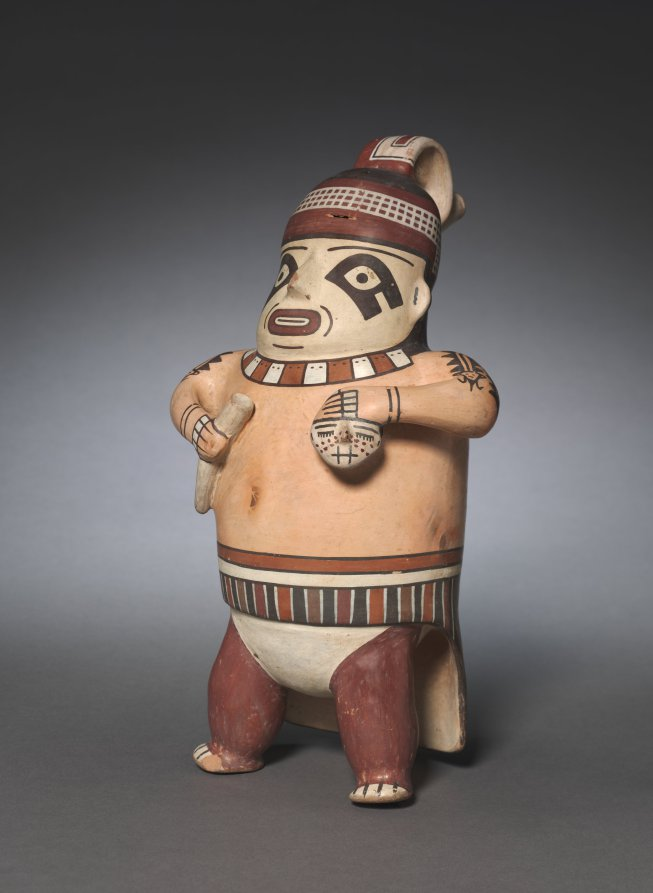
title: Male Effigy Vessel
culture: Peru, South Coast, Nasca, Early Intermediate Period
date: 100–650 CE (thermoluminescence date, 410–1010 CE)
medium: ceramic and slip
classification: Ceramic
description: The style is typically Nasca: modeling is minimal and the surface is decorated with the vibrant, earth-colored slips that are a hallmark of Nasca ceramic art. Male figures are a well-known category of Nasca ceramic production, although the shape of this one, which stands upright on two legs and is additionally supported from behind by a long loincloth, is unusual.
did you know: This figure holds a human head, which the Nasca viewed as a source of great power.